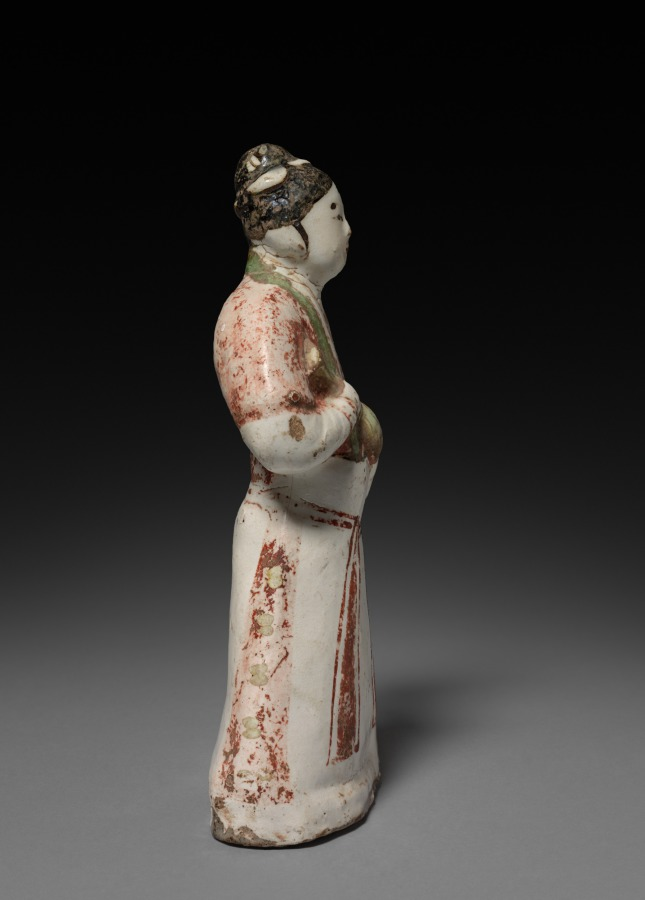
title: Lady Holding a Vase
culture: China, Northern Song dynasty (960-1127) - Jin dynasty (1115-1234)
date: 1100s–1200s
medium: Stoneware with slip decoration, Cizhou ware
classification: Ceramic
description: The Cizhou ware kilns never produced for the imperial court, but made potted utensils needed in daily life. They also fired ceramic figurines, which are believed to have been used as toys. The maid or palace lady here holds a long-necked vase of a type that watered flowers. The figurine, perhaps made as a toy for a girl, was molded in clay and covered with a white slip and transparent glaze, over which some colors in red, green, and ocher were applied. Cizhou kiln potters were one of the first in China who applied overglaze enamel-like colors on glazed, high-fired ceramics.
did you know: This hollow stoneware figure of a woman has firing hole visible at the bottom.